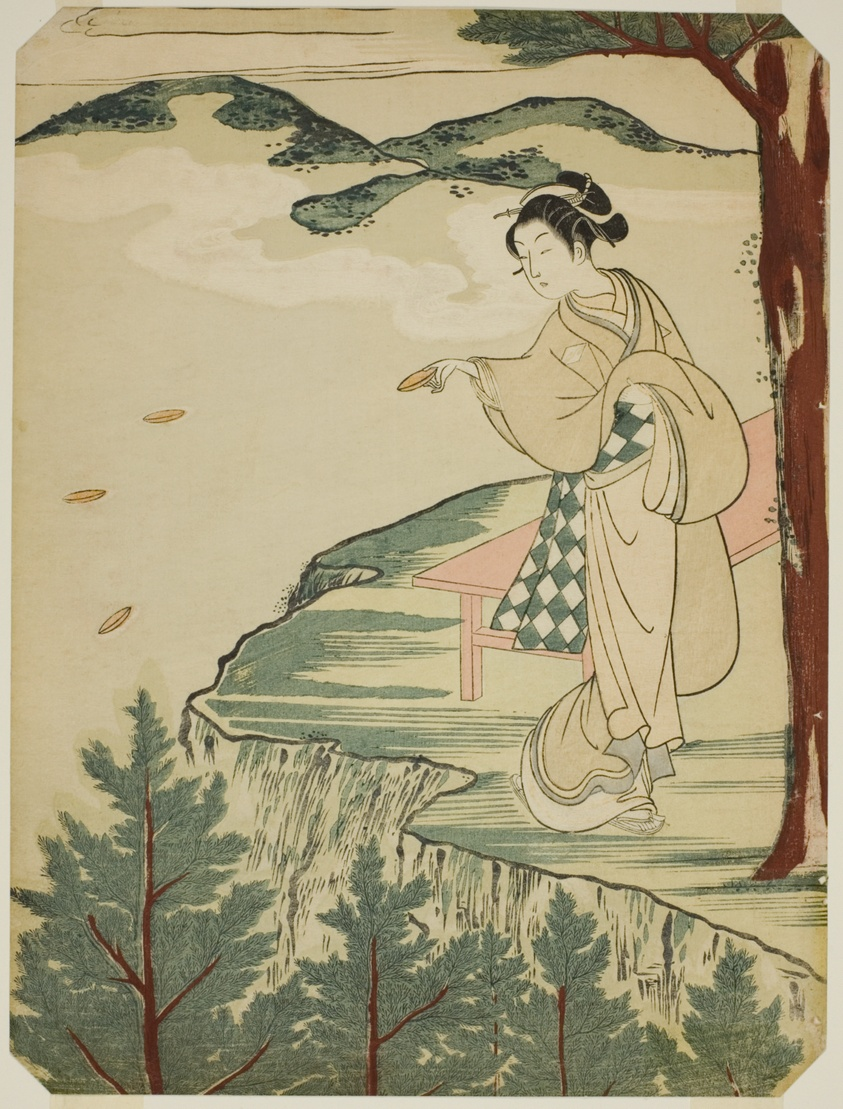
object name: Print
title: Tossing Dishes Over a Cliff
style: Japanese (culture or style)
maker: Suzuki Harunobu 鈴木 春信; Japanese, 1725 (?)-1770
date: c. 1766/67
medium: Color woodblock print; chuban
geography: Japan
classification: woodblock print; print; asian art